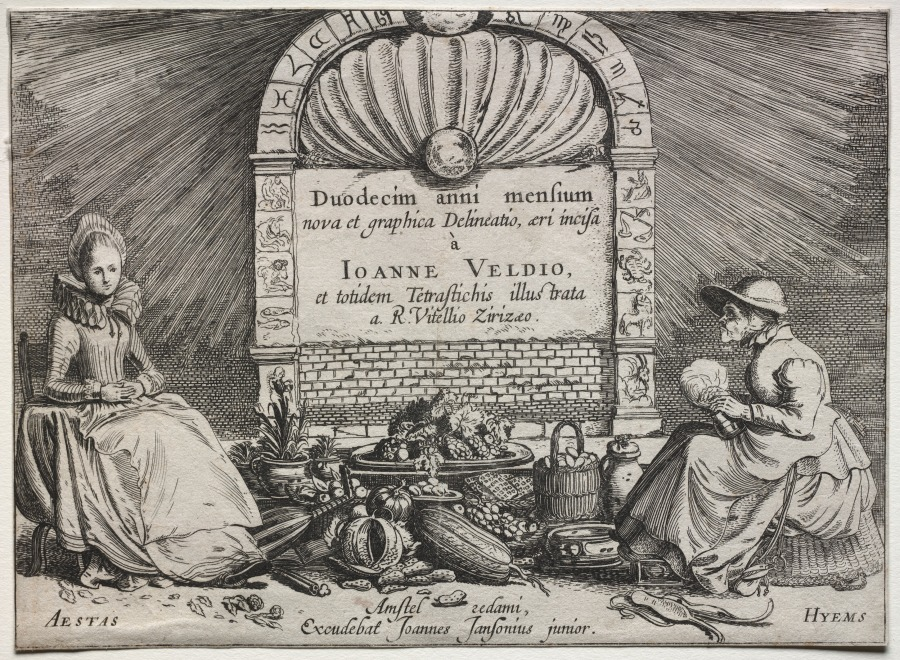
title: The Twelve Months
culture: Netherlands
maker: Jan van de Velde II (Dutch, 1593–1641)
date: 1608–18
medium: etching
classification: Print